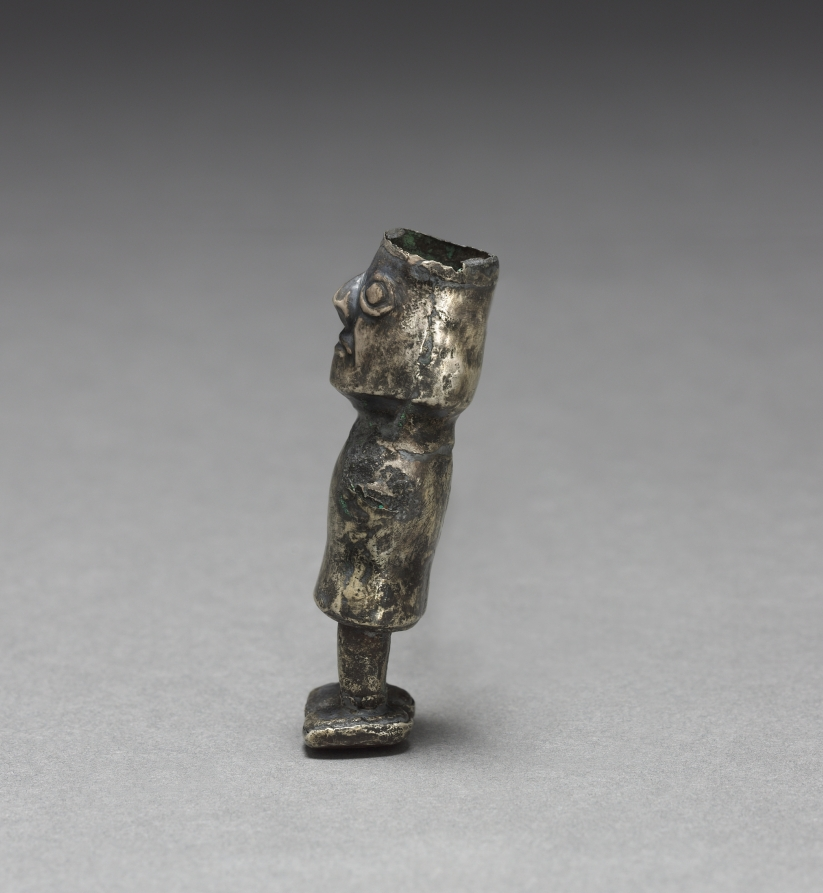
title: Figure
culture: Peru, Lambayeque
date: 1000–1532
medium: silver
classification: Metalwork